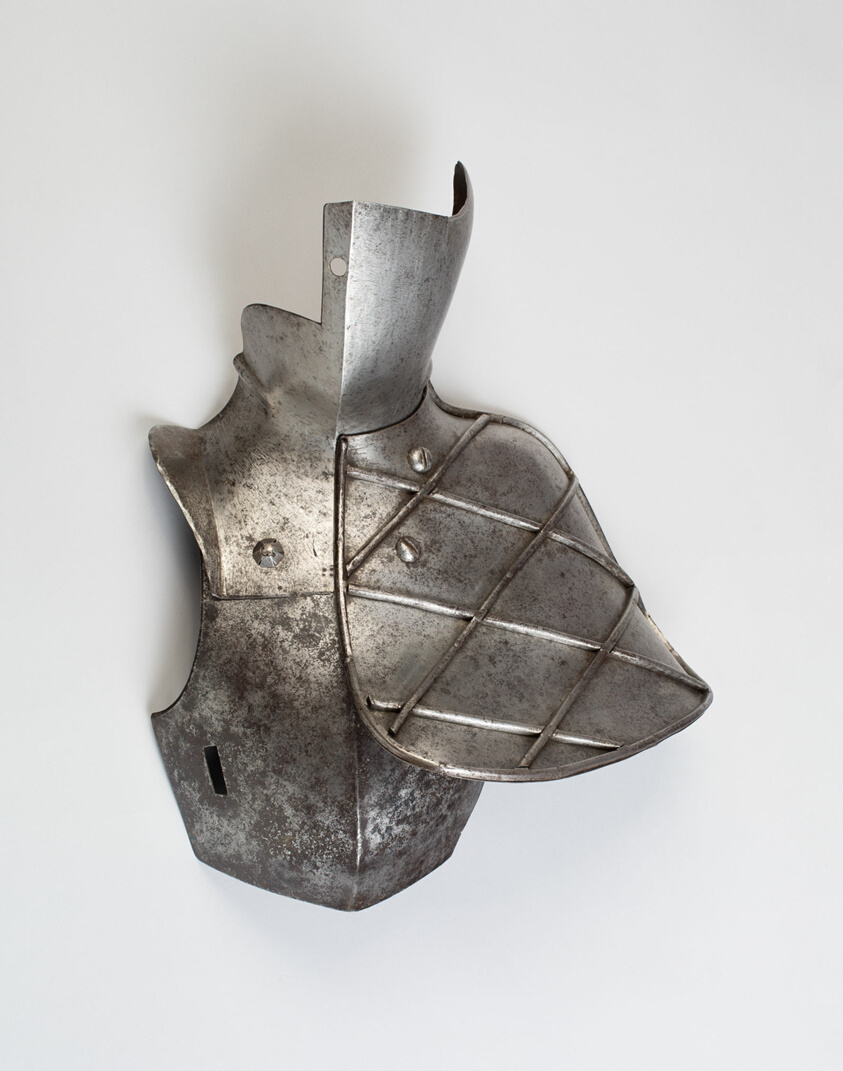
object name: Armor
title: Reinforcing Breastplate Bevor, and Grandguard for the Joust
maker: South German, Augsburg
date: c. 1560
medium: Steel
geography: Augsburg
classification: suit-element; armor; arms and armor